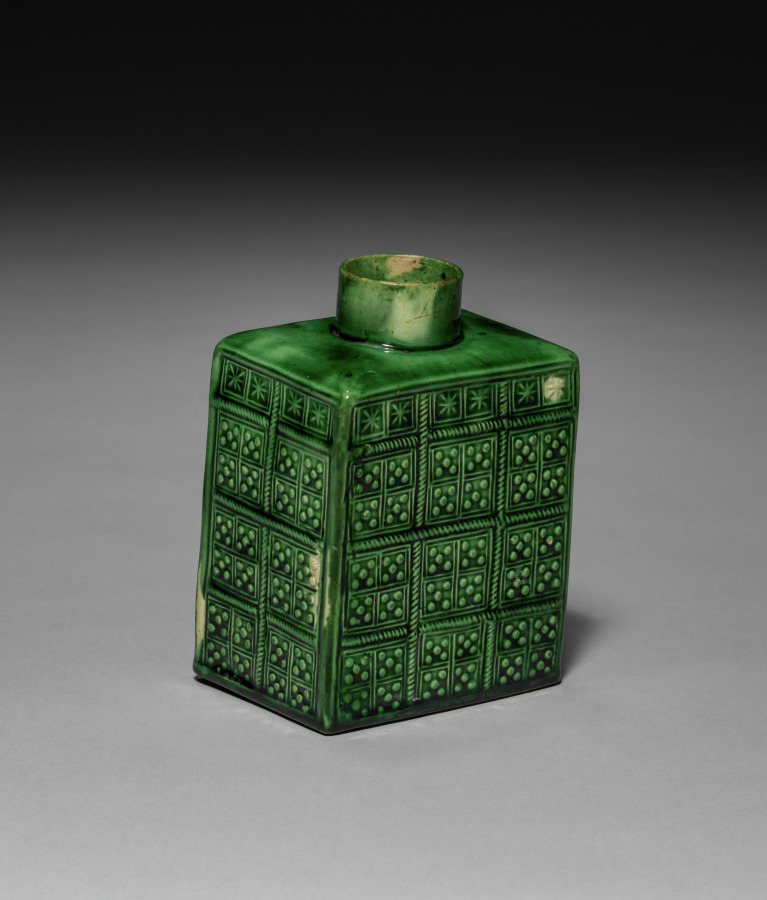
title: Tea Caddy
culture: England, 18th century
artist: Staffordshire Factory (British)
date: c. 1750–1800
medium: earthenware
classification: Ceramic